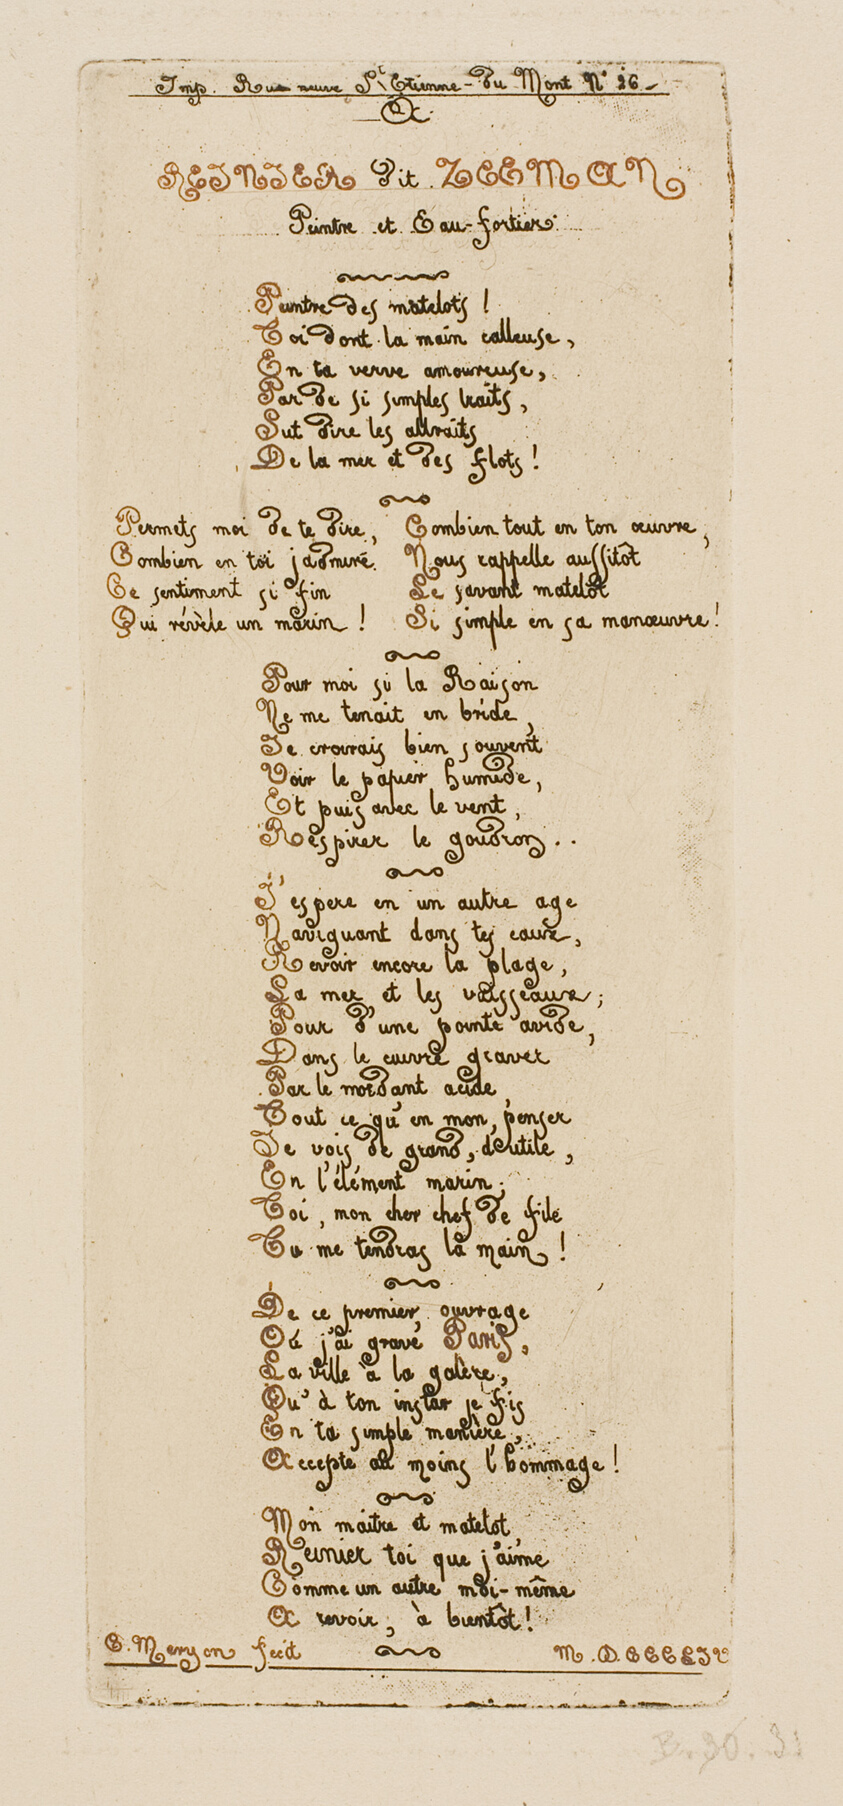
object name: Print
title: Dedicatory Verses by Meryon to Reinier Nooms, Called Zeeman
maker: Charles Meryon (French, 1821-1868)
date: 1854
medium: Etching in black and red on ivory wove paper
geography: France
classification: etching; print; prints and drawing